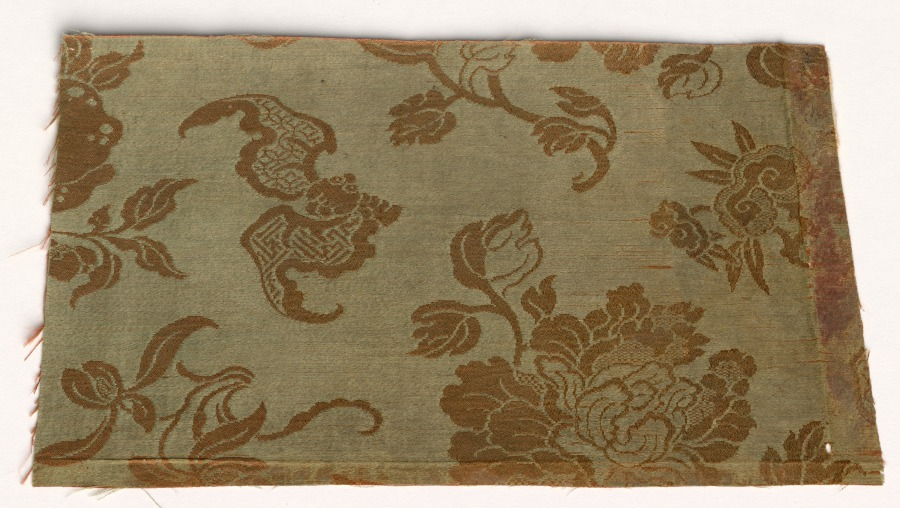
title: Textile Fragment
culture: Japan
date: 1800s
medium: silk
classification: Textile